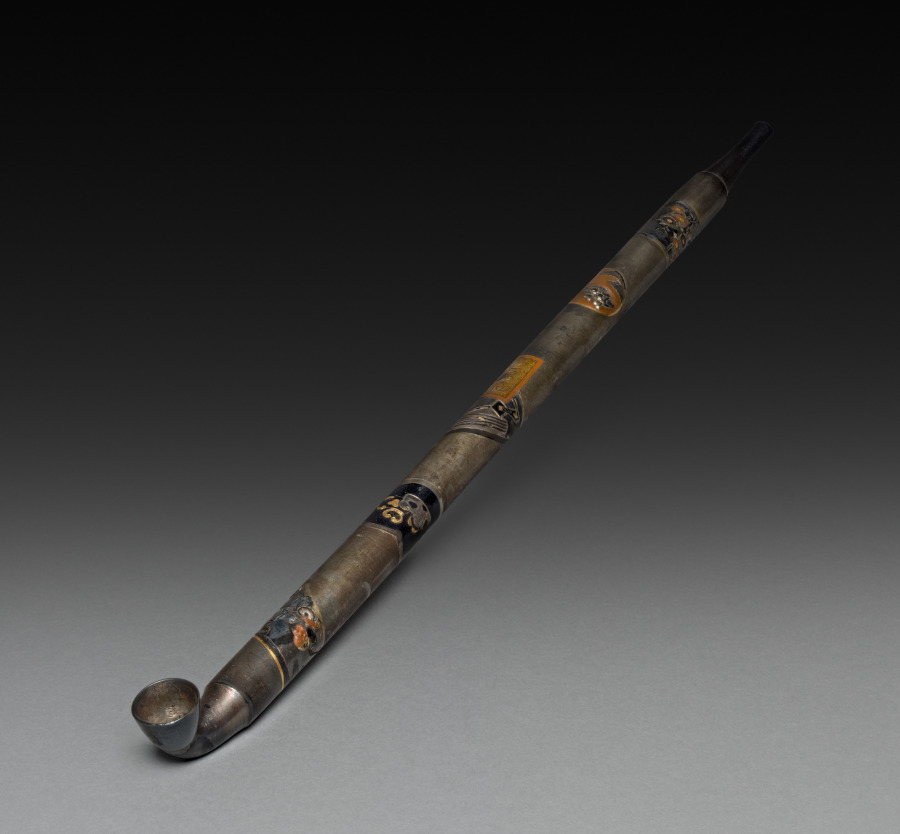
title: Tobacco Pipe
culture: Japan, Edo period (1615–1868)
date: 1700s to mid-1800s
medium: metal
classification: Miscellaneous